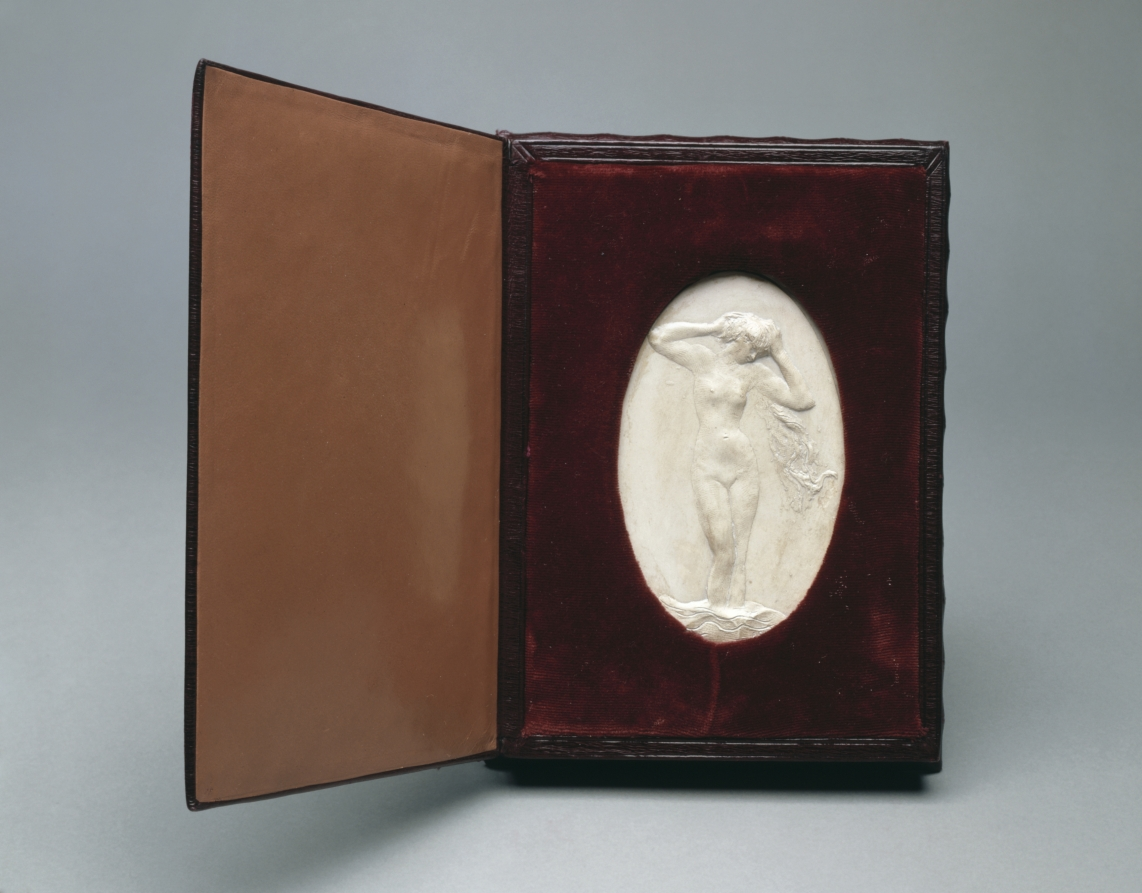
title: Vénus Astarté (Semitic goddess of fertility and love)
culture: France, early 20th Century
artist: Auguste Rodin (French, 1840–1917)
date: c. 1900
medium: plaster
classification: Sculpture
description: This relief of a female nude standing in water may represent the only time the great French sculptor Auguste Rodin provided an ornament for a precious object: a gold and enamel hand mirror designed by Felix Bracquemond (1833–1914). The mirror—acquired by the museum in 1978—was made for Baron Joseph Vitta, one of Rodin's most important patrons during the years around 1900, and it was probably for this reason that the artist agreed to the commission. This plaster cast of Rodin's nude was an intermediate version of the subject. Although the images on the mirror and the plaster cast were clearly derived from the same mold, there are significant differences in the figure's hair. Rodin probably changed the wax version (from which the gold relief of the mirror was made by lost-wax casting) before he used it.